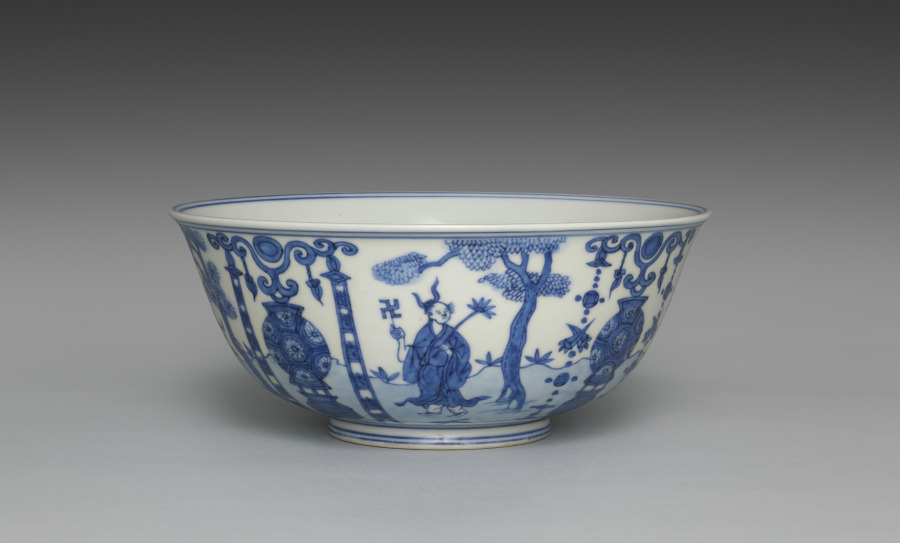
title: Bowl from Nesting Bowls with Daoist Immortals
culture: Japan, Meiji period (1868–1912)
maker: Seifū Yohei III (Japanese, 1851–1914)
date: 1893–1914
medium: Inner bowl from a set of three bowls; porcelain with underglaze blue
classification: Ceramic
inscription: 大日本清風造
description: Yohei III was capable of ink painting–like compositions in underglaze blue, as well as more decorative ones like that on this set of three nesting bowls. Bowls with very similar designs in five colors were produced in the reign of the Wanli emperor (reigned 1572–1620) during the Ming dynasty, and Yohei must have had direct access to one of these or to a close copy. A scene of Daoist immortals is presented on the bowls. On each one, the ground plane is defined with a blue wash. Four lanterns are evenly spaced around the bowl. Two are flanked with linked-piece metalwork banners of the seven treasures. The alternate altars are adorned with textile banners. In between them are four immortals, each standing beneath a tree with small plants surrounding his feet. Two of the immortals hold fruit on a tray. Another carries an elixir-filled ewer and a willow branch. The fourth holds a swastika (manji), here an auspicious symbol, and a flower. Curiously, the inscription inside each footring reads “Made by Seifu of Great Japan,” in emulation of the dynasty and reign inscriptions that appear on Chinese ceramics; however, one can also see through the translucent glaze another inscription, “Seifu Yohei,” written in large characters within a double band of blue on the largest bowl.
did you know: In the bottom of each bowl is a scene of two robed immortals who appear to stand on a precipice in a mountainous landscape high in the clouds, with celestial orbs over their heads.